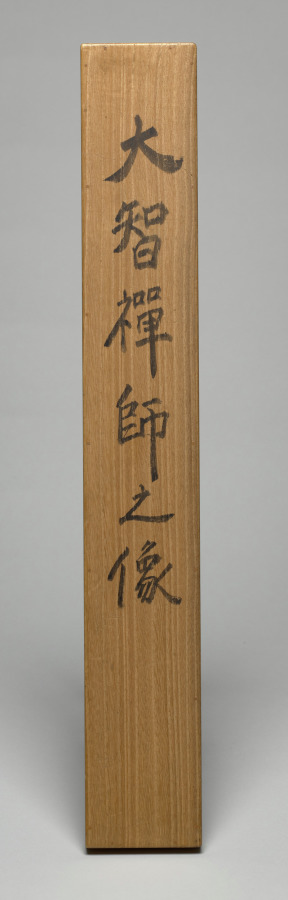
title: Portrait of Priest Dazhi (1048–1116), Master of Law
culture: China, Southern Song dynasty (1127-1279)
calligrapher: Liu Tao (Chinese, late 1000s–early 1100s)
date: 1100s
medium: Hanging scroll; ink and light color on silk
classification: Painting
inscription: Inscription by Liu Tao (late 1000s–early 1100s): Dignified with the perfection of the upasampada,/ His appearance is like his mind;/ Uncompromising and loftily aloof,/ His mind is like his appearance./ To say he is square, he proves to be round;/ He looks timid, yet his spirit is unbound./ Having no attachment, and holding no reins,/ Man and deities alike take refuge in him. (Translation by WKH, 1980)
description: Monk Yuanzhao, with the honorific title Dazhi Lüshi, Great Wisdom Master of Vinaya, is depicted here as an itinerant monk, holding his alms bowl in the left and staff in the right. In 1142, Emperor Gaozong had bestowed Yuanzhao with a posthumous title, mentioned in the inscription, which suggests that the portrait was made after the master’s death. A master of the Lü sect of Buddhism, with a calm benevolent smile on his face, Yuanzhao was active on Mount Tiantai and in Hangzhou. Later, Liu Tao, a southerner from Changxing, added the inscription. The eulogy reads: Dignified he is, perfect in his upasampada [ordination of a monk]. His appearance is like his mind. Uncompromising and aloof. His mind is like his appearance. To say he is square, he proves to be round. He looks timid, yet his spirit is unbound. Having no attachment, and holding no reins, men and deities alike take refuge in him. —translated by Wai-Kam Ho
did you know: A native of Hangzhou, the priest Dazhi was known for his eloquent exposition of Buddhist doctrines and for his success in winning many converts.